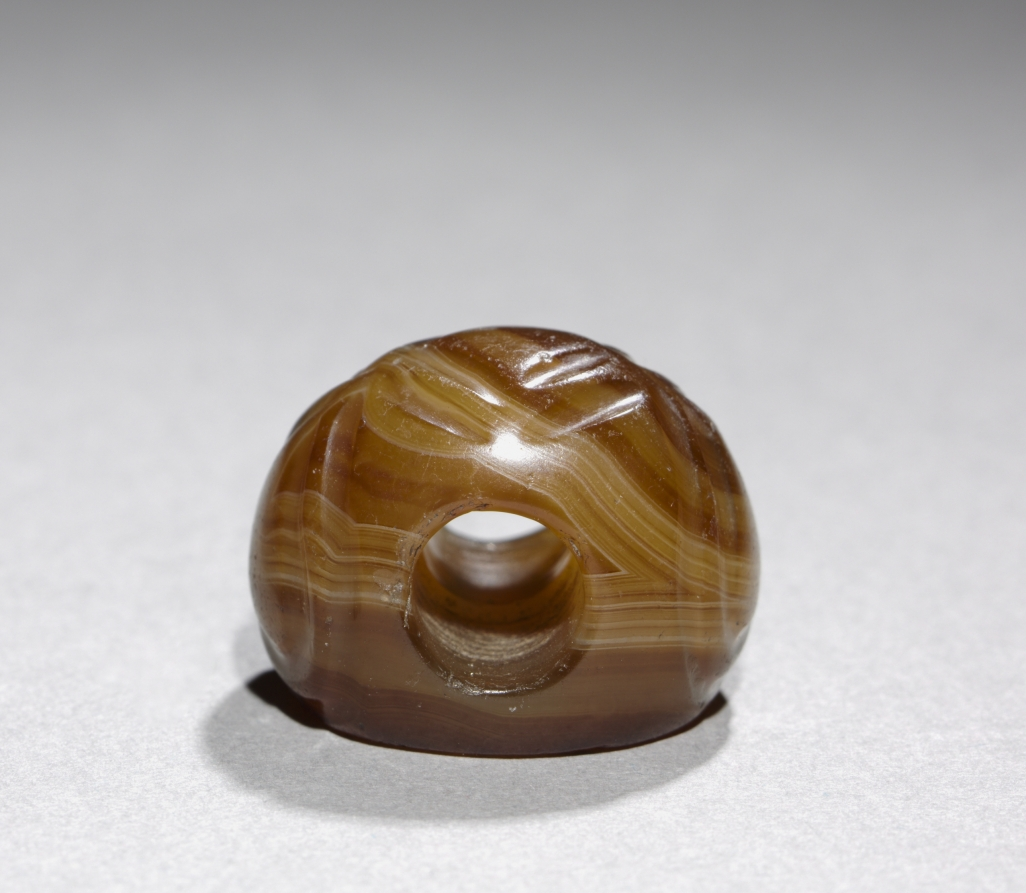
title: Fire Altar Intaglio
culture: Iran, Sasanian Empire (224–651 CE), reign of Hormizd II (303–309)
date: c. 400 CE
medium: chalcedony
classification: Glyptic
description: A Zoroastrian fire altar is carved into this chalcedony intaglio, consisting of a pedestal, pillar, and bowl for an eternal flame. A bird perches above the altar bowl and fish flank the pedestal. A carved star decorates the backside. A pierced hole through the gemstone suggests it once hung on a cord around a neck or wrist. Although the fire altar is a Zoroastrian religious symbol, birds and fish also occur in Christian iconography.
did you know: Seal stones served as signatures and seals for documents.